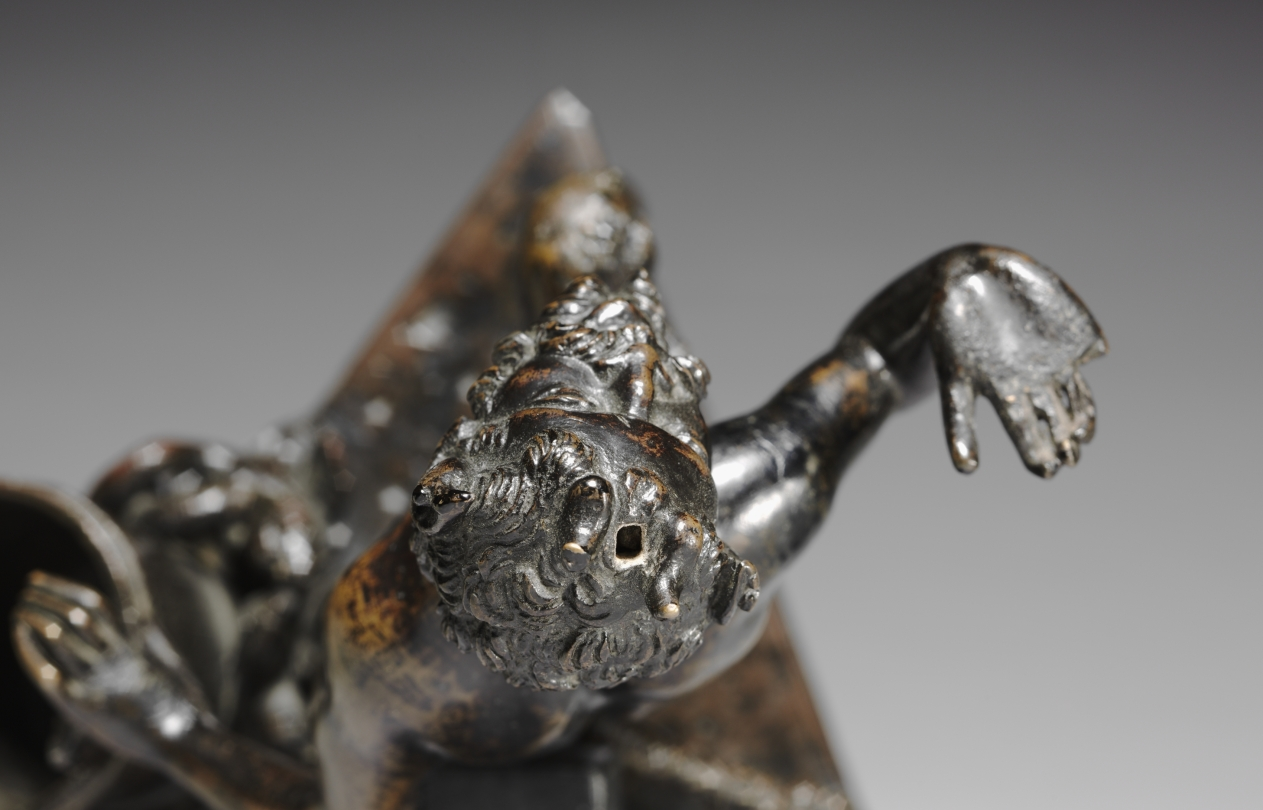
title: Kneeling Satyr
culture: Italy, Ravenna, 16th century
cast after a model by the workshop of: Severo da Ravenna (Italian, c.1496–c.1543)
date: c. 1520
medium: bronze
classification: Sculpture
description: Greek and Roman art and literature typically used satyrs as a form of grotesque comic relief, but Renaissance artists adopted them as jovial celebratory figures of nature and revelry.